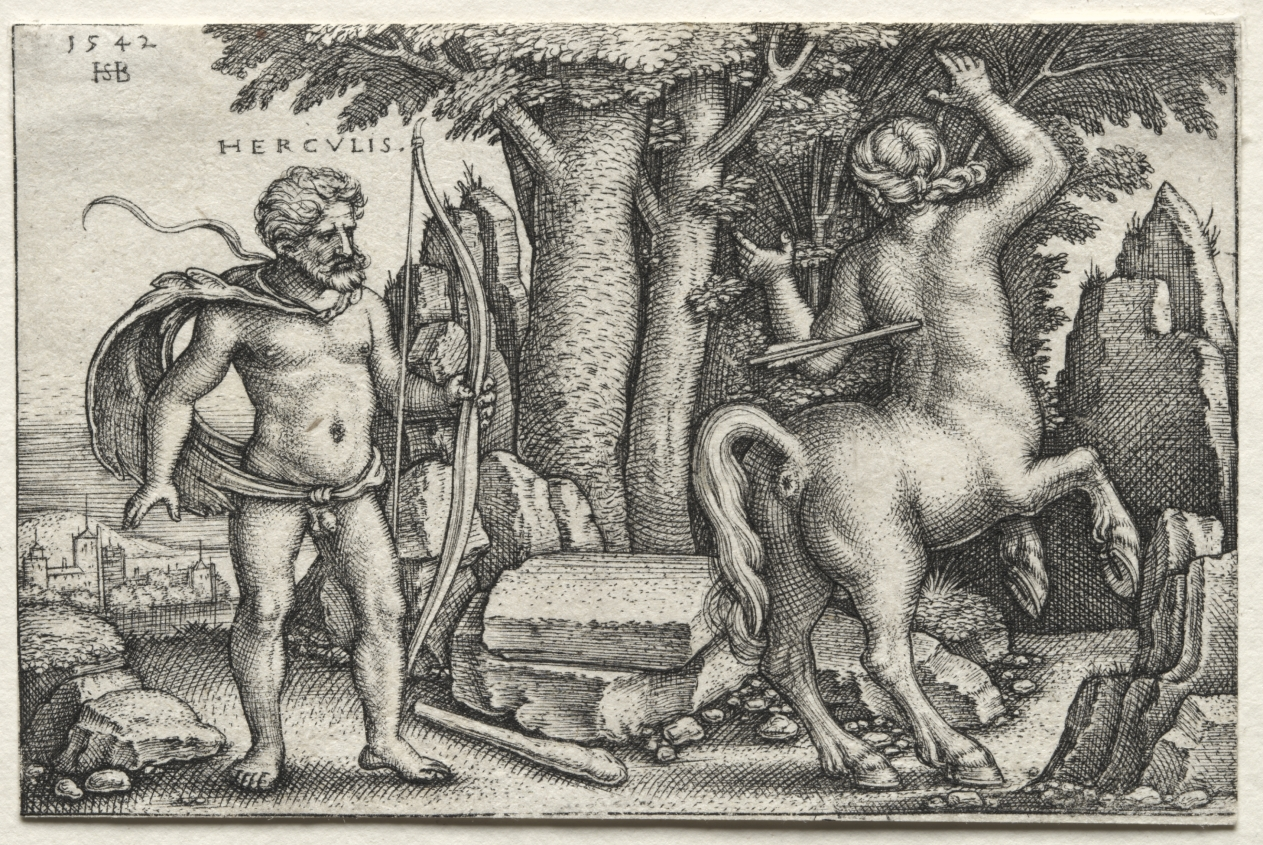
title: The Labors of Hercules: Hercules and Nessus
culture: Germany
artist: Hans Sebald Beham (German, 1500–1550)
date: 1542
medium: engraving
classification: Print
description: Hercules and his wife Deianeira came to a river where the centaur Nessus offered to carry Deianeira across the water. While crossing, Nessus sexually assaulted her, and Hercules slayed the centaur with a poisoned arrow. Before he died, Nessus deceitfully told Deianeira to collect his blood—now tainted by the toxic arrow—to use as a love potion on Hercules. Beham was one of several German printmakers referred to today as the “Little Masters.” They established their artistic prowess by engraving remarkably small prints, appealing to collectors fascinated with miniature objects and curiosities.